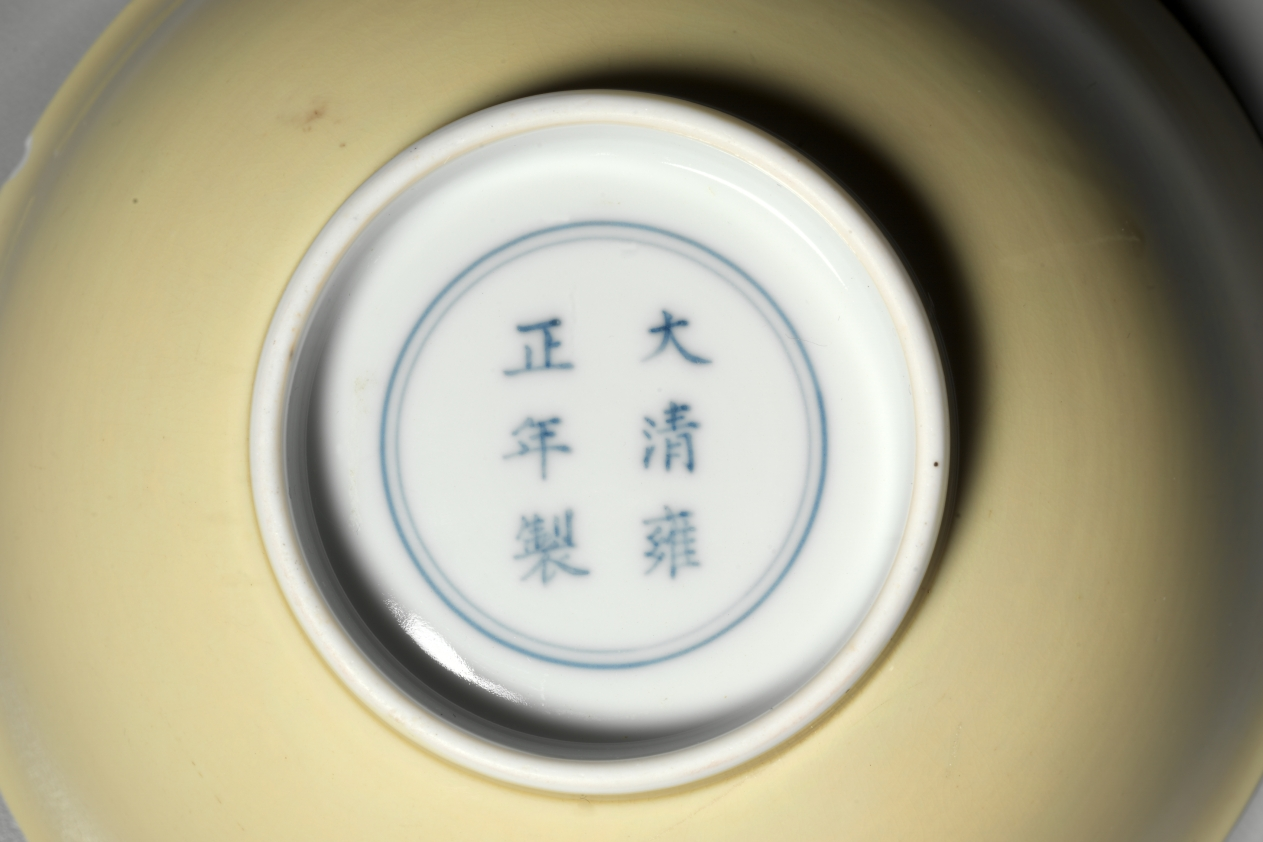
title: Bowl with Yellow Glaze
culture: China, Qing dynasty (1644-1911), Yongzheng mark and reign (1723-35)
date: 1723–35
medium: glazed porcelain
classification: Ceramic